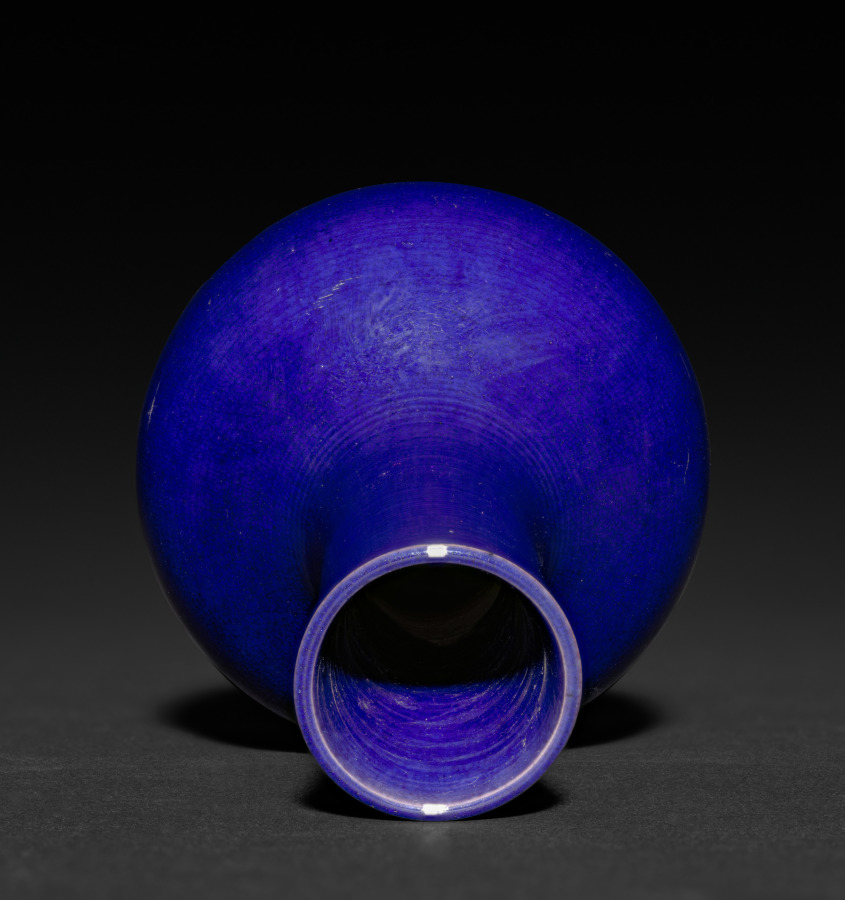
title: Bottle-Shaped Vase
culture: China, Qing dynasty (1644–1911), Qianlong reign (1736–95)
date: 1736–95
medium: porcelain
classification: Ceramic